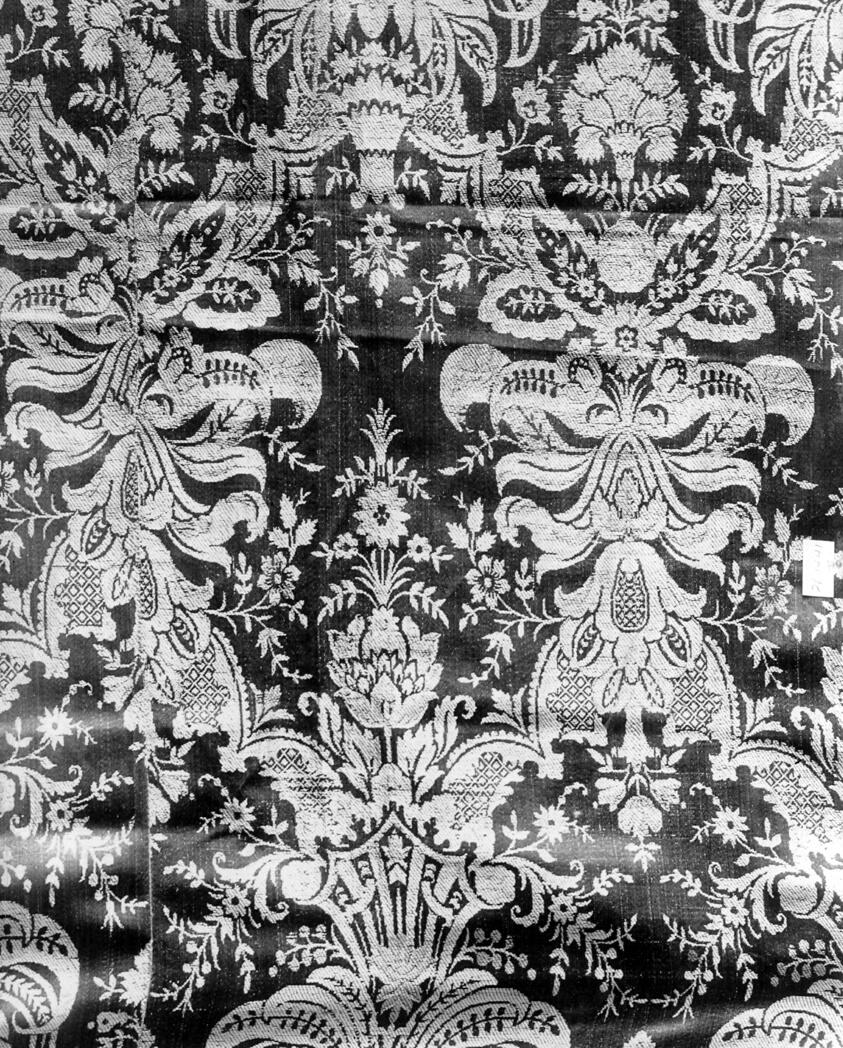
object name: Textile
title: Fragment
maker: France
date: 18th century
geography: France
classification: textile; weaving